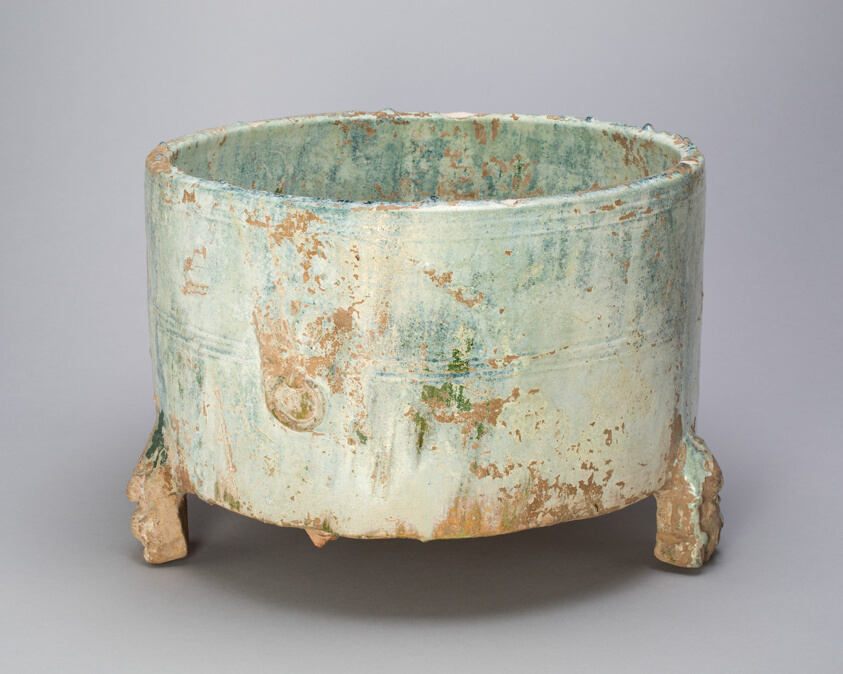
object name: Vessel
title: Tripod Cylindrical Jar (Lian or Zun)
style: Chinese (culture or style)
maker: China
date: Eastern Han dynasty (25–220 A.D.), 2nd century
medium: Earthenware with green lead glaze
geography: China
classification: earthenware; asian art; ceramics; vessel